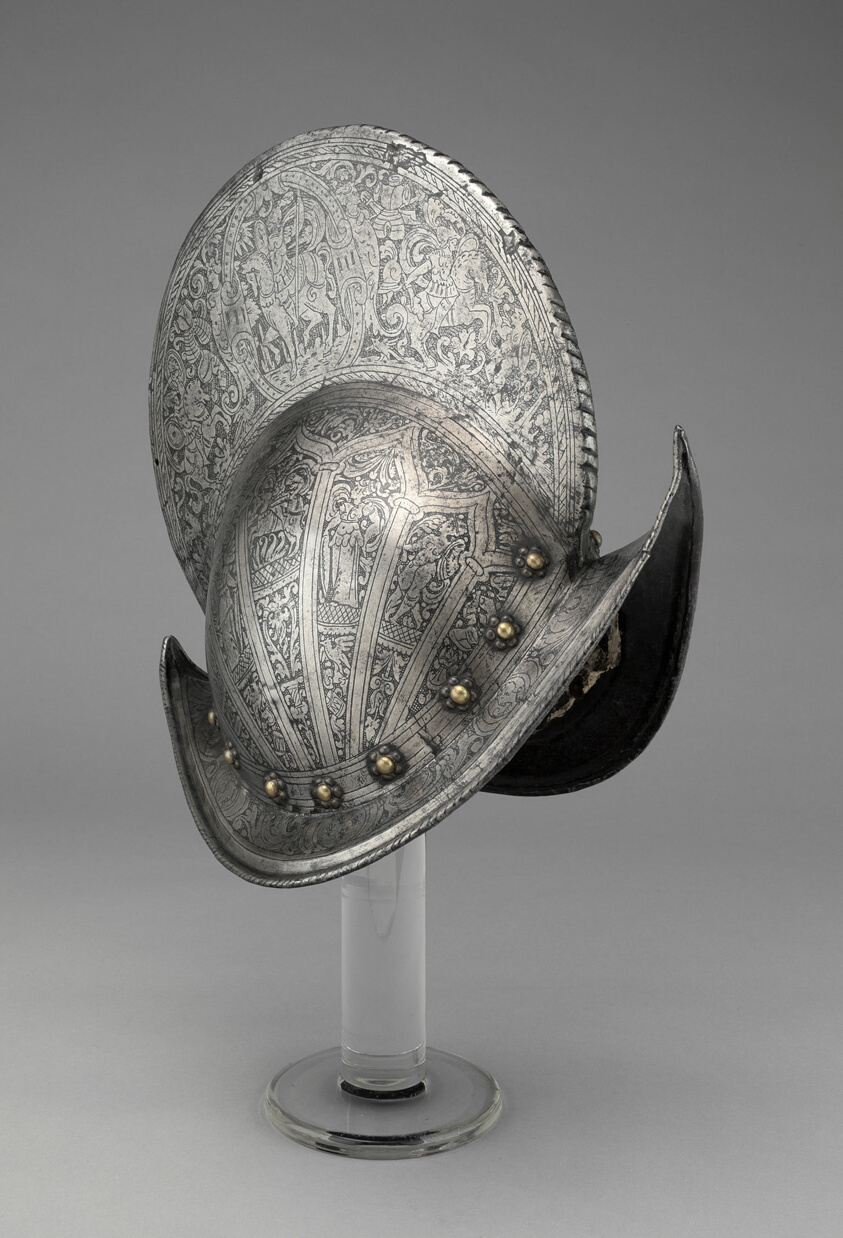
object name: Armor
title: Comb Morion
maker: Northern Italian, probably Brescia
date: 1580/90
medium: Steel, brass, and leather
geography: Brescia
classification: suit-helmet; armor; arms and armor